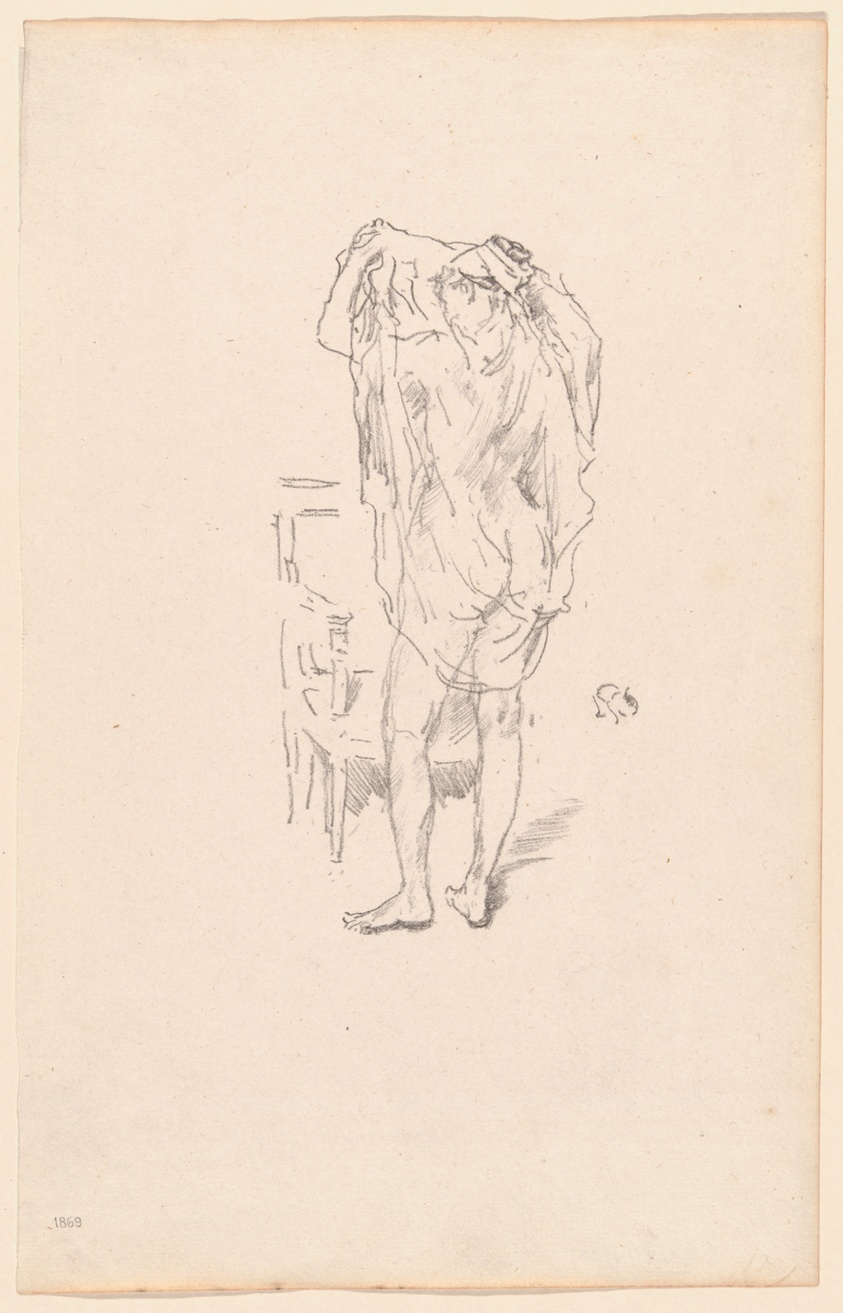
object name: Print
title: Study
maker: James McNeill Whistler (American, 1834-1903)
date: 1894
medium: Transfer lithograph in black on ivory laid paper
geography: United States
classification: transfer lithograph; lithograph; print; prints and drawing; paper